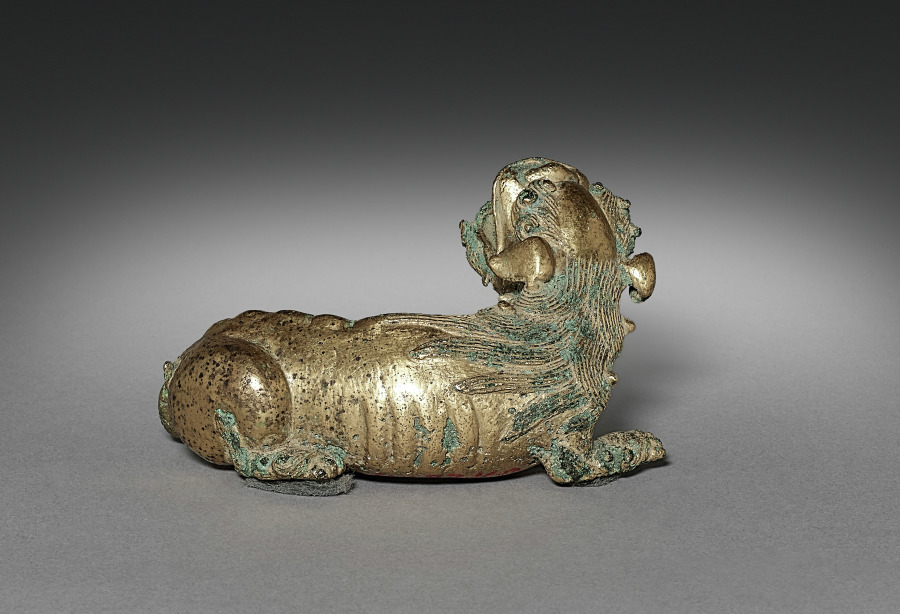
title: Dog-shaped Paperweight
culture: Korea, Unified Silla period (676-935)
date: 676–935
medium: gilt bronze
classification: Sculpture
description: This small object in the shape of a hybrid dog-lion is believed to have been used as a paperweight. Since the Three Kingdoms period (57 BC−668), mercury amalgam gilding had been widely employed to embellish metal objects as well as to make their surface resistant to acids. This technique involves mixing pure gold powder with liquid mercury to form a paste-like mixture. As heat is applied, the mercury evaporates, but an opaque layer of gold remains on the surface. This coating must be polished by first rubbing it with dried rice seedlings, then processing it in ash lye to eliminate impurities; next, the piece is washed and rinsed in a plum vinegar bath.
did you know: This is a dog and lion hybrid.